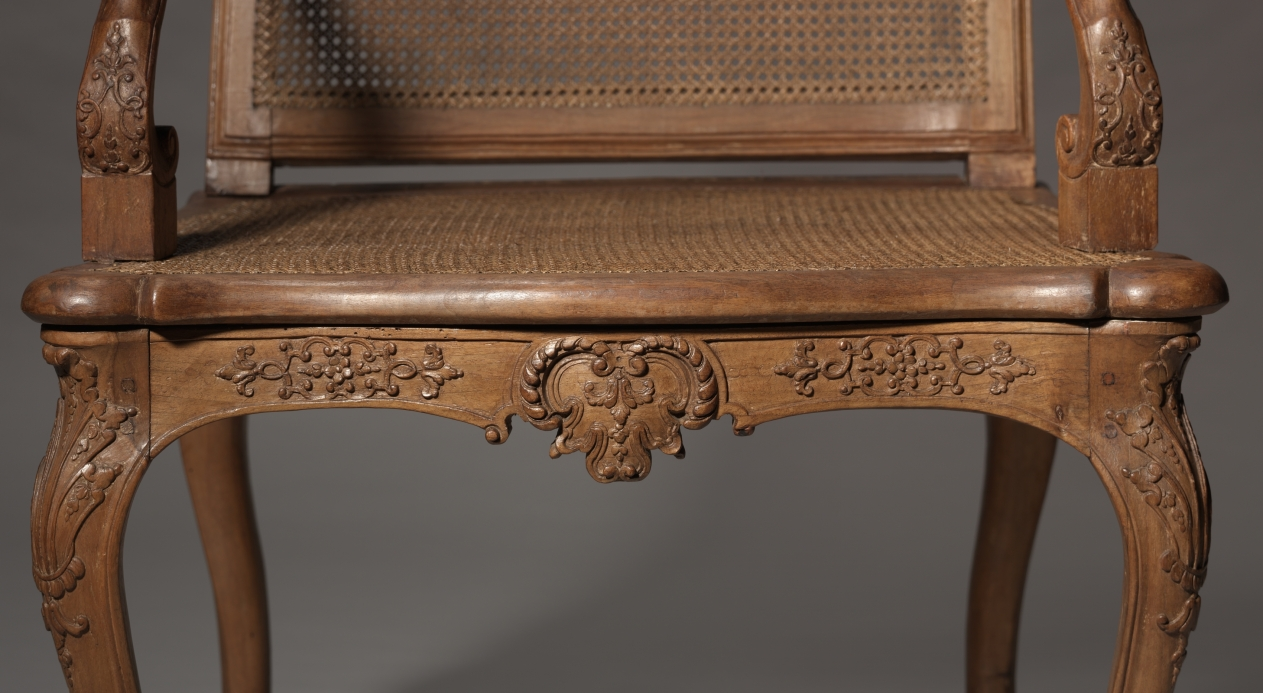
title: Armchair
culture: France, Regence Style, 18th Century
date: 1715–1730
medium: walnut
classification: Furniture and woodwork